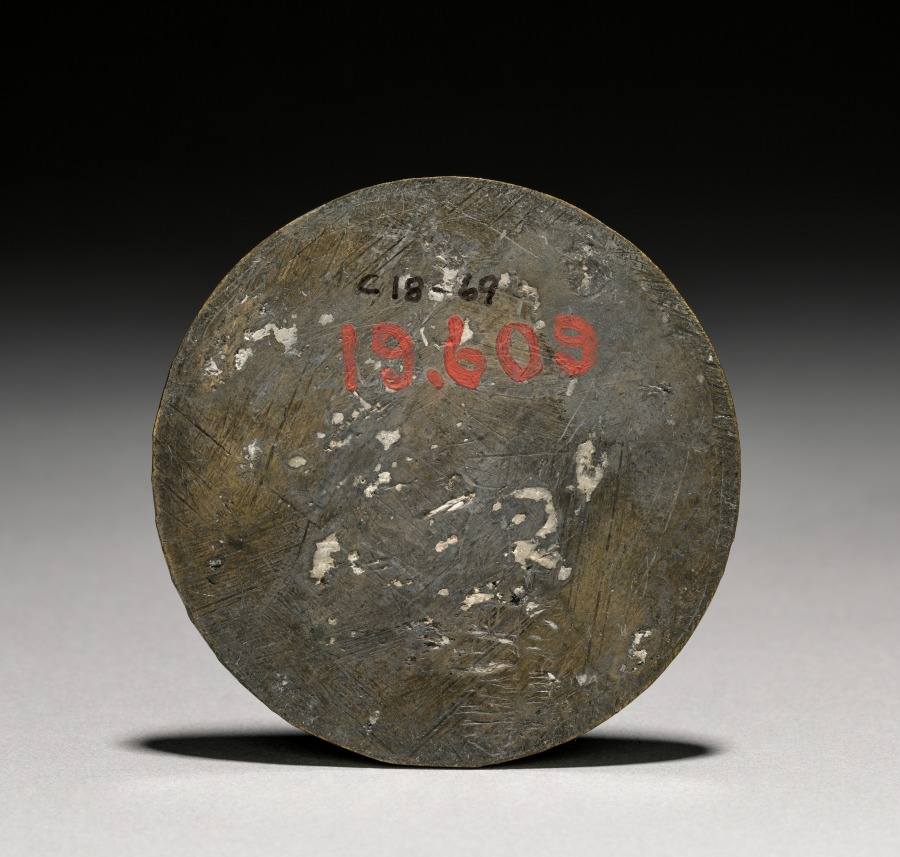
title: Penton Medal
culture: America, Ohio, Cleveland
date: early 1900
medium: bronze proof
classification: Metalwork